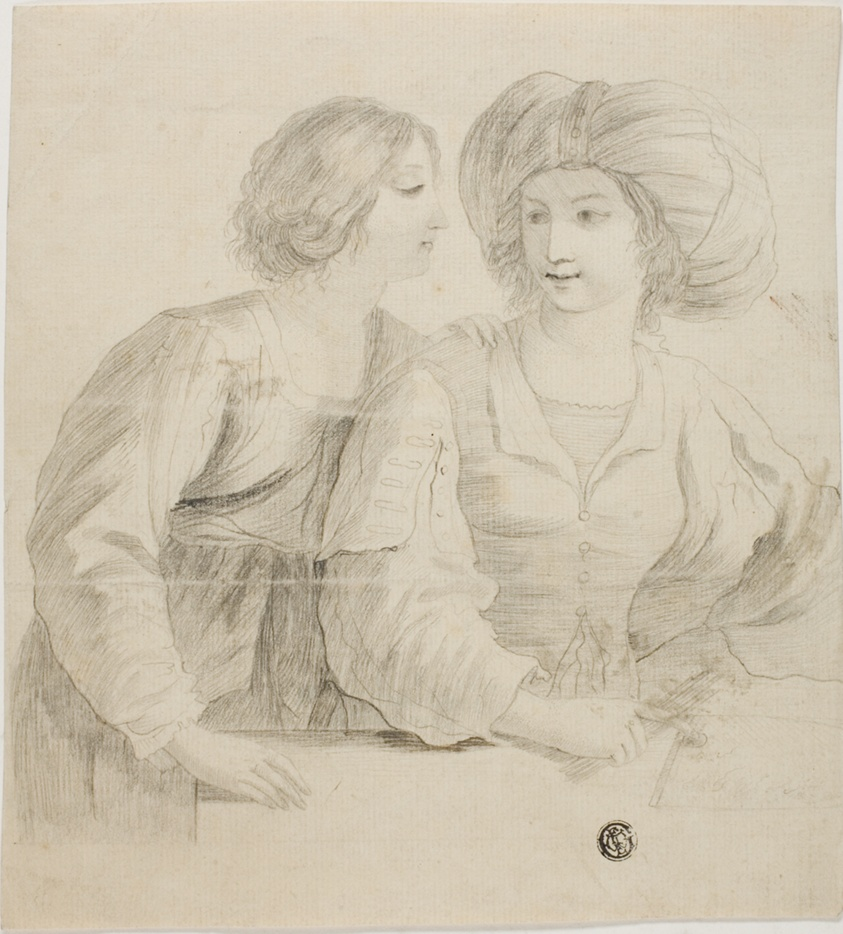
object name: Drawing and Watercolor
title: Two Young Women, One Wearing Turban, in Conversation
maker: After Guercino; Italian, 1591-1666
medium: Graphite, heightened with lead white (discolored), on cream laid paper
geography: Italy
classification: graphite; drawings (visual works); prints and drawing